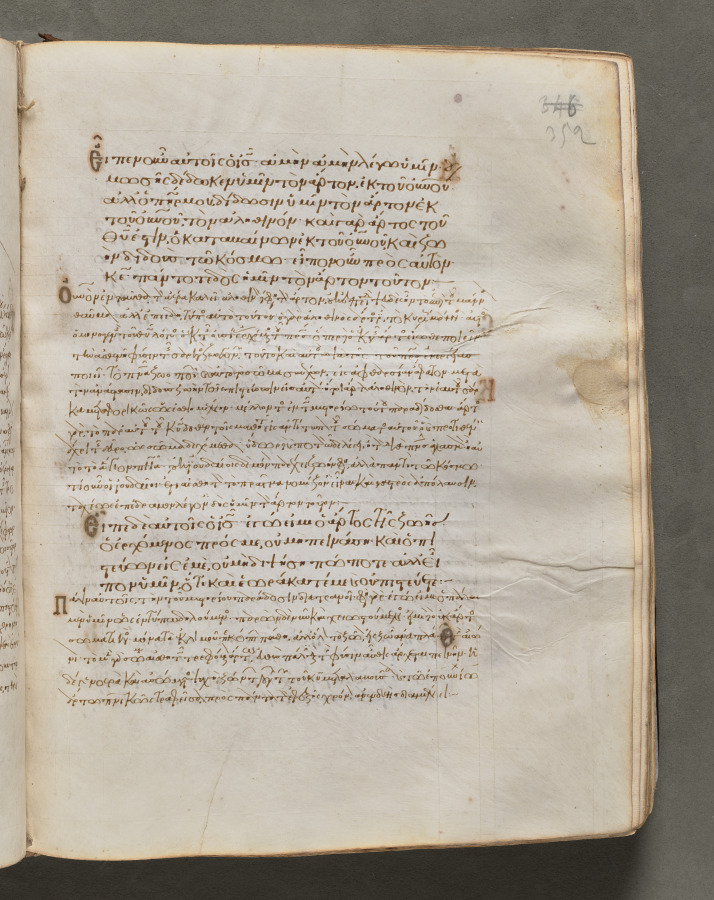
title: Text, folio 352 (recto), from a Gospel Book with Commentaries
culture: Byzantium, Constantinople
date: c. 1000–1100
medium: ink, tempera, and gold on vellum; leather binding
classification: Bound Volume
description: Each of the four gospels in this book opens on a page with brilliantly illuminated borders depicting the author of the text as well as birds—principally peacocks, symbols of the immortality of the soul—and fountains, representing the fountain of life and the salvation of the soul. This volume consists of 428 leaves with texts in Greek. Its level of sophistication suggests that it was probably written and decorated in a monastery in Constantinople.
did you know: Gospel books were carried in procession through Byzantine churches.